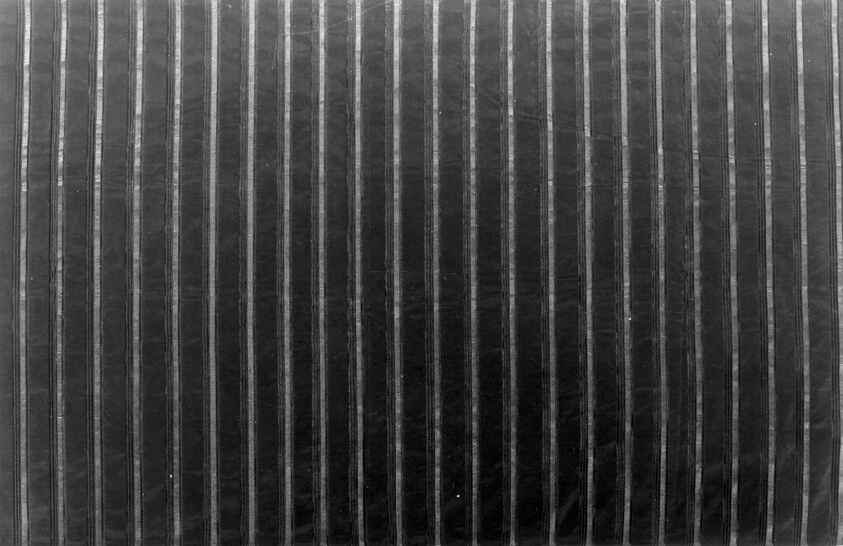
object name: Textile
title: Two Panels from a Dress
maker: Europe or United States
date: 1860s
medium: Silk and cotton, bands of plain weave; plain weave with supplementary patterning wefts bound in plain interlacing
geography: Europe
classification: textile; weaving